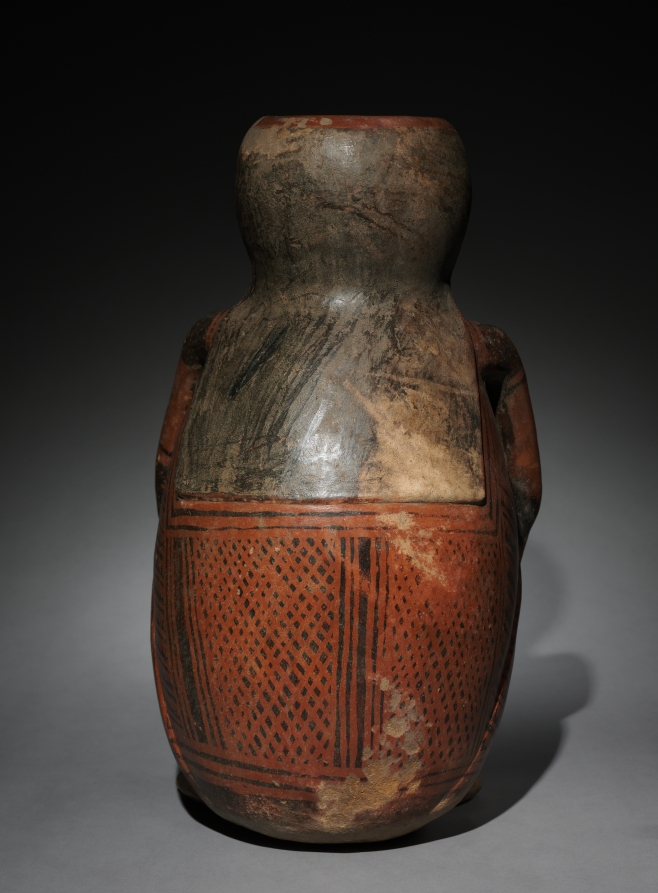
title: Anthropomorphic Vase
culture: Colombia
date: 500–1500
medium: earthenware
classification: Ceramic